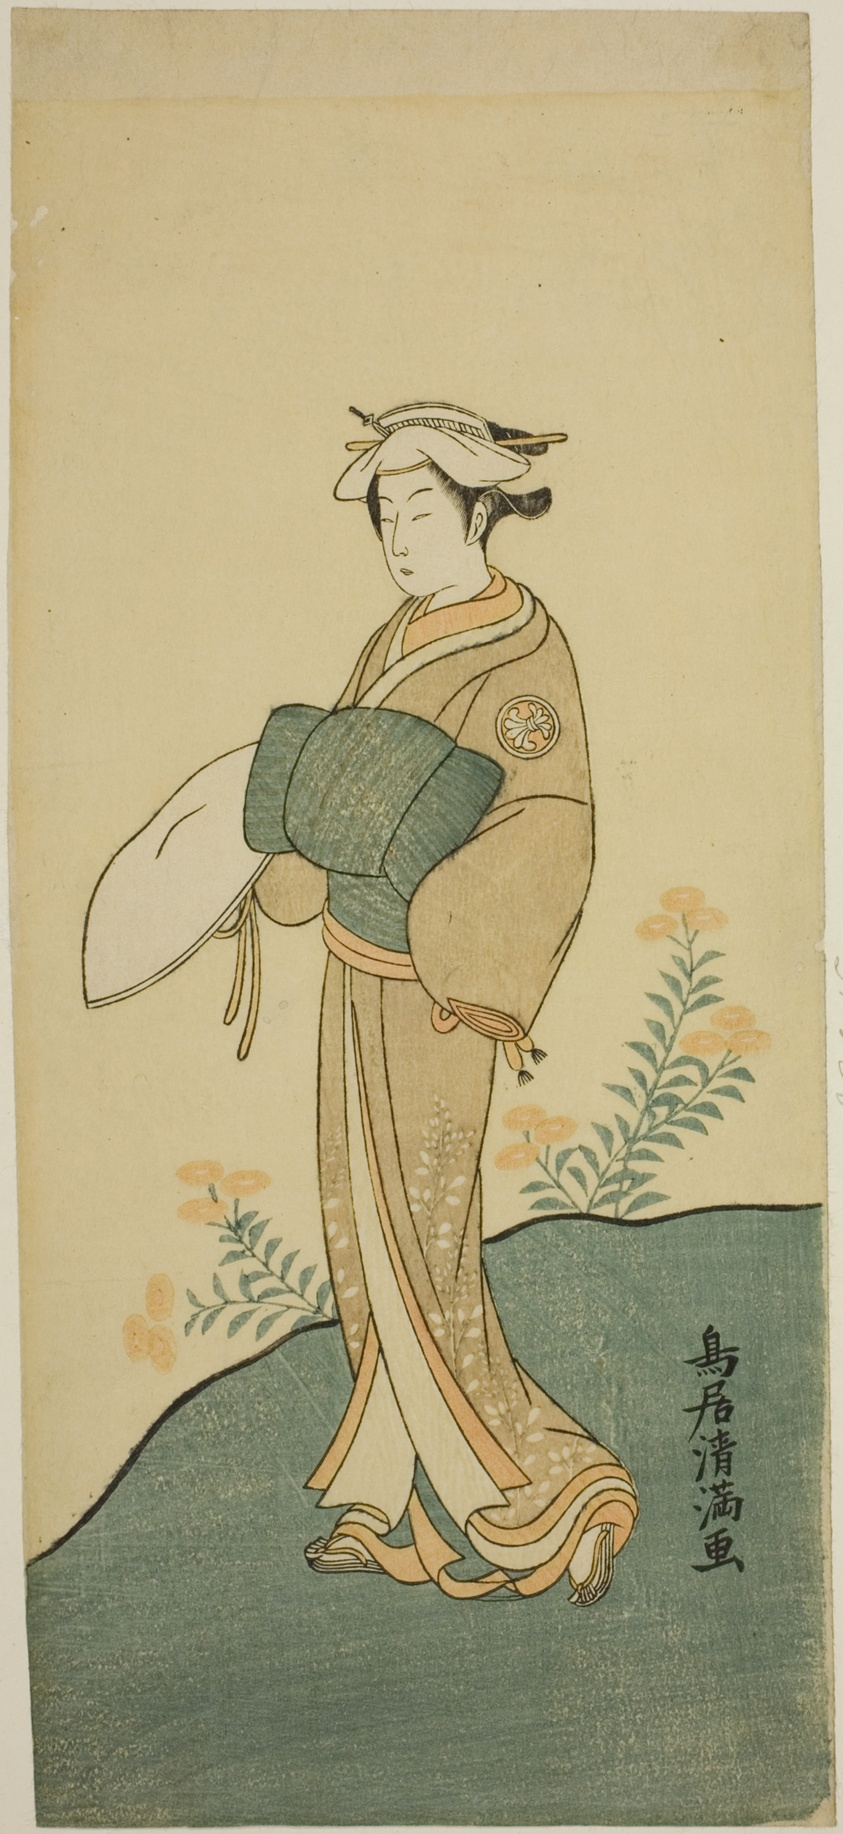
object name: Print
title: The Actor Segawa Kikunojo II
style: Japanese (culture or style)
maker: Torii Kiyomitsu I (Japanese, 1735–1785)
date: c. 1771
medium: Color woodblock print; hosoban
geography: Japan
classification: woodblock print; print; asian art